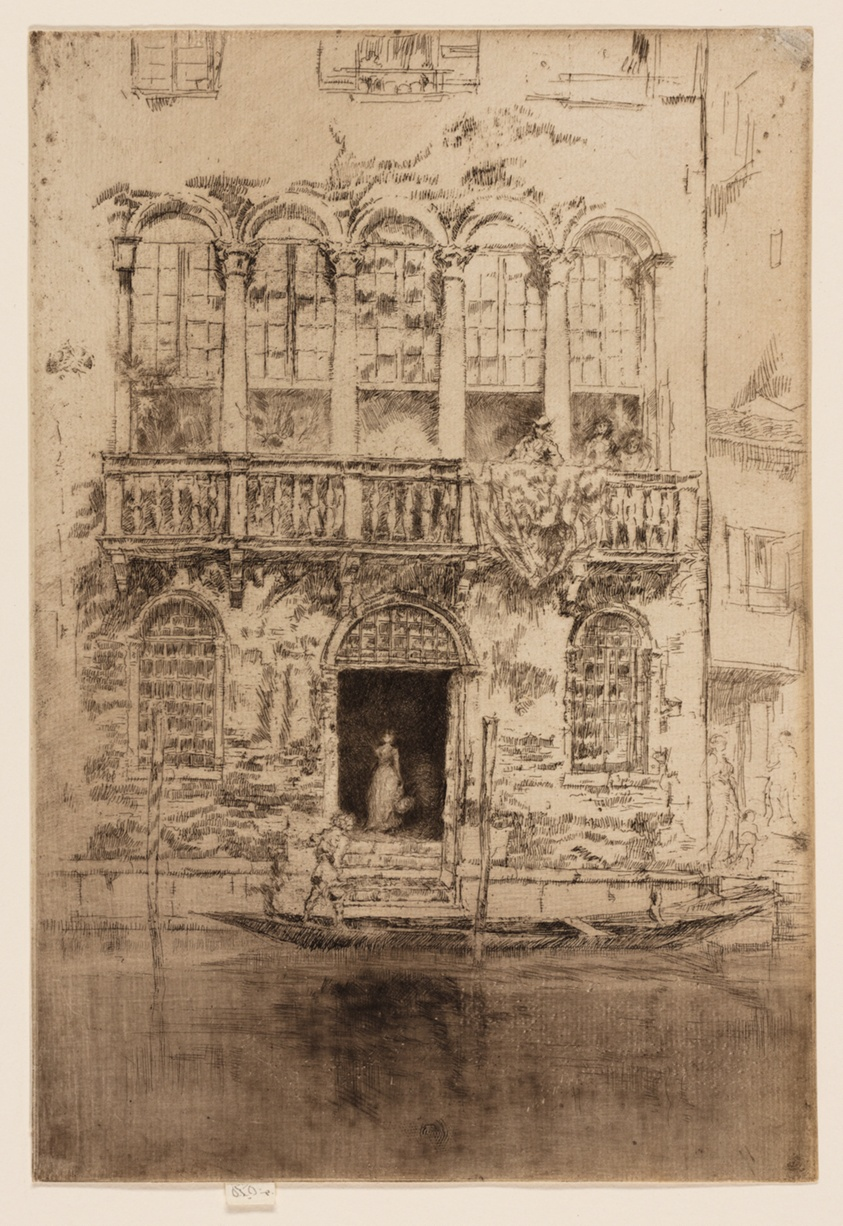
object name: Print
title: The Balcony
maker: James McNeill Whistler (American, 1834-1903)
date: 1879/80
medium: Etching and drypoint with foul biting in dark brown ink on ivory laid paper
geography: United States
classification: etching; foul biting; print; prints and drawing; drypoint; paper